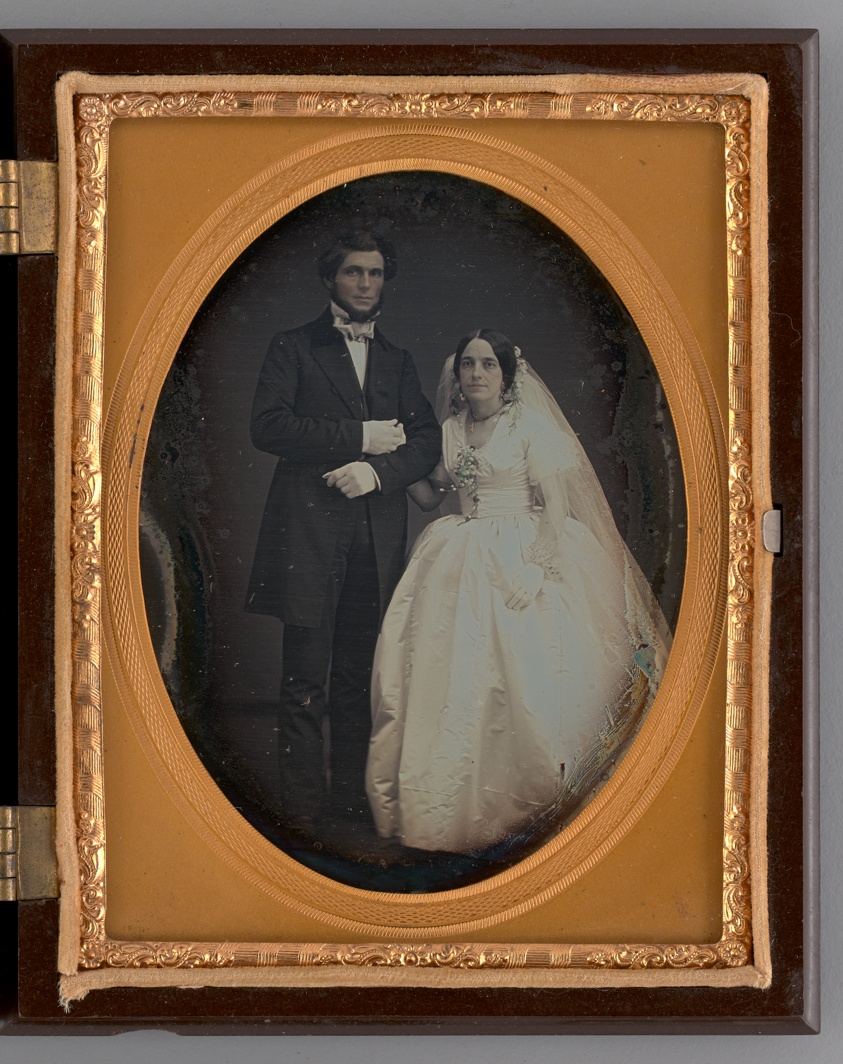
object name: Photograph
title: Untitled (Wedding Portrait)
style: 19th century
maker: Unknown maker; American, 19th century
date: 1861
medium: Daguerreotype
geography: United States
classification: portrait; photograph; photographic process; photography; portrait; daguerreotype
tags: lundberg collection, portraits, couples, portrait, portraits: multiple subjects